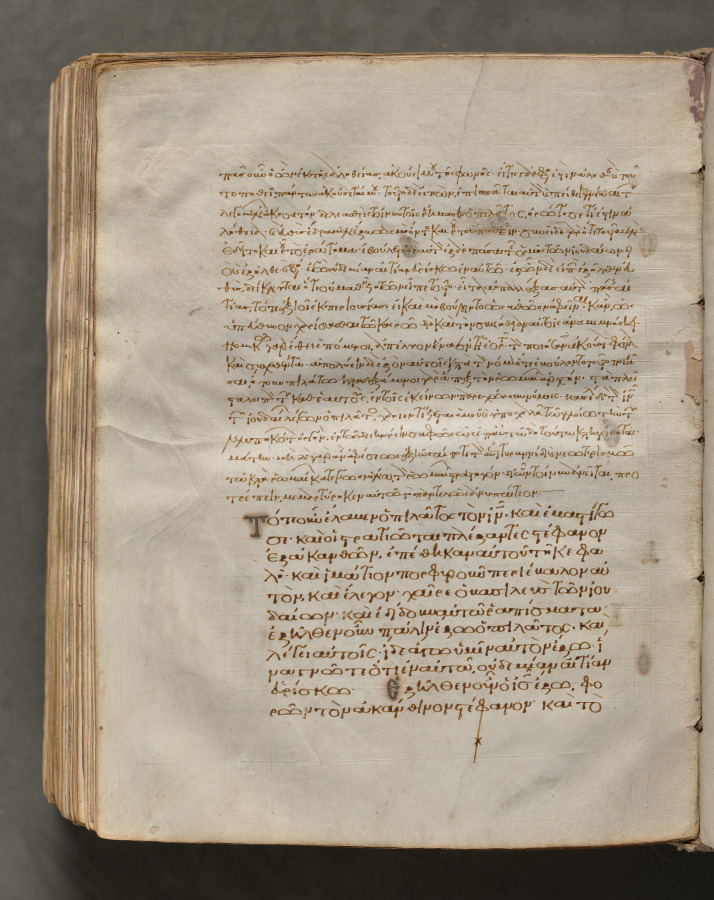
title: Text, folio 411 (verso), from a Gospel Book with Commentaries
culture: Byzantium, Constantinople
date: c. 1000–1100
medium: ink, tempera, and gold on vellum; leather binding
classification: Bound Volume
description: Each of the four gospels in this book opens on a page with brilliantly illuminated borders depicting the author of the text as well as birds—principally peacocks, symbols of the immortality of the soul—and fountains, representing the fountain of life and the salvation of the soul. This volume consists of 428 leaves with texts in Greek. Its level of sophistication suggests that it was probably written and decorated in a monastery in Constantinople.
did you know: Gospel books were carried in procession through Byzantine churches.